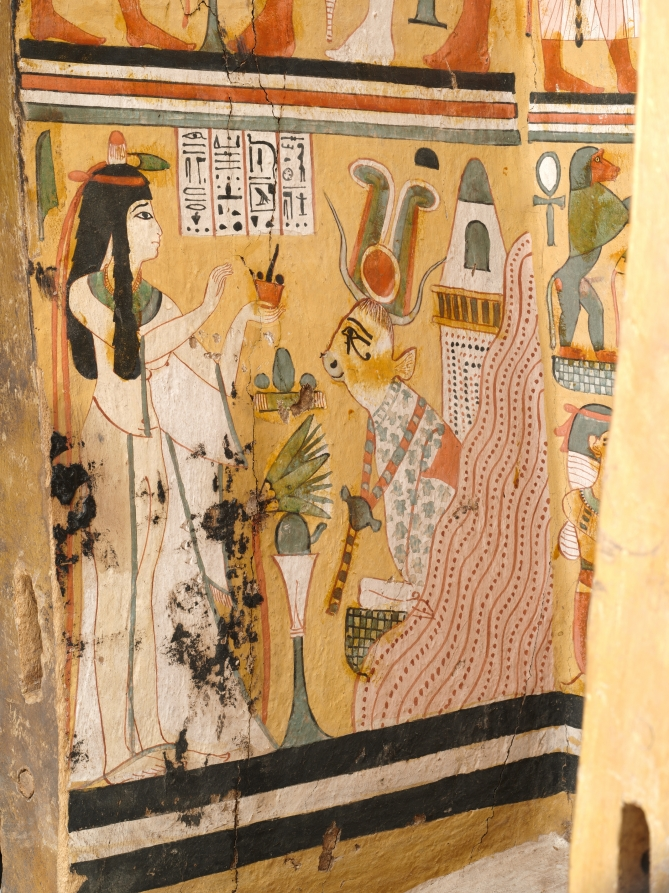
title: Coffin of Nesykhonsu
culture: Egypt, Thebes, Third Intermediate (1069–715 BCE), Dynasties 21–22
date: c. 976–889 BCE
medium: gessoed and painted sycamore fig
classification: Funerary Equipment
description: Egyptian coffins told stories and illustrated spells to help the deceased transition safely to the afterlife. Inside Nesykhonsu's coffin there are two jackals, one facing right and the other left, near the top. Here, the jackal represents the powerful deity Anubis, the god of the afterlife and embalming.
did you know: Two of Nesykhonsu's titles, "Lady of the House" and "Singer of the Choir of Mut the Great," are written on the outside of the coffin.